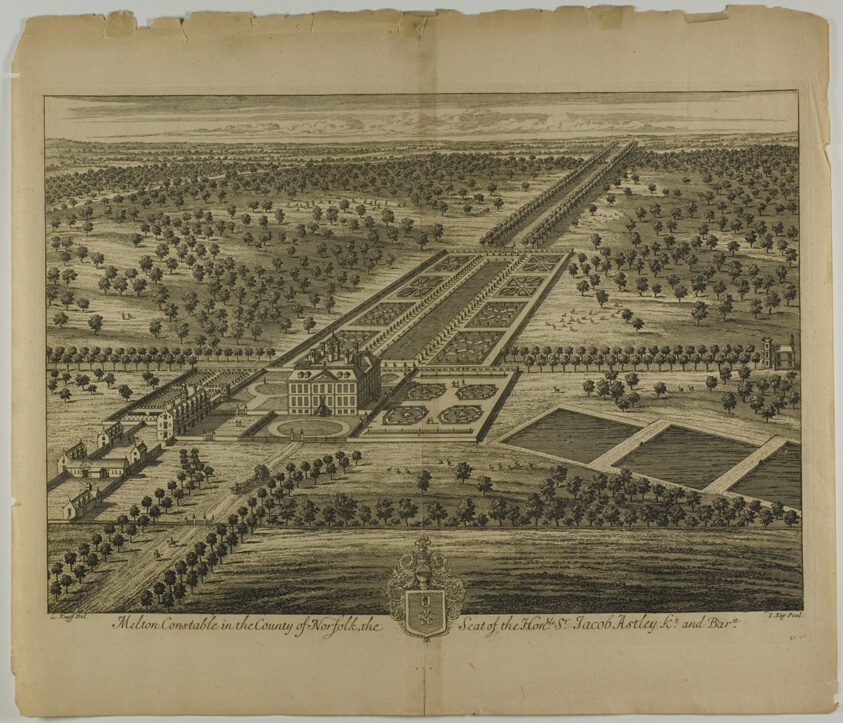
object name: Print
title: Melton Constable in the County of Norfolk, plate 51 from Britannia Illustrata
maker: Jan Kip (Dutch, c. 1653-1722); after Leonard Knyff (Dutch, 1650-1721); published by David Mortier (French, 1673-1728)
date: published 1707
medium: Etching and engraving in black on cream laid paper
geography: Netherlands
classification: prints and drawing; engraving; etching; print